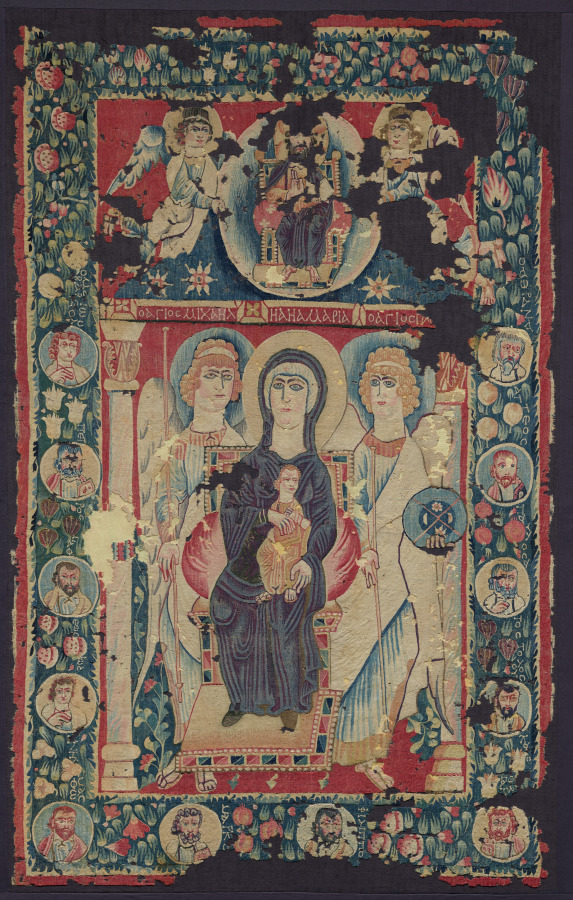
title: Icon of the Virgin and Child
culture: Egypt, Byzantine period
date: 500s CE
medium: wool and dye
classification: Textile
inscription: on the lintel of the architectural setting, the Greek inscription translates as: The Holy Michael, The Holy Mary, The Holy Gabriel. The wide foliate border is decorated with fruits and flowers and, in the lower part, with medallions containing the busts of apostles whose names are inscribed nearby in Greek and are translated as: Andrew, Matthew, Paul the Apostle, Luke, James, Phillip, Mark, Thomas, John, Matthias, Peter, and Bartholomew.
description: Woven from more than 20 colors of woolen thread, this rare tapestry was more expensive than a painting when it was made. The historical price reflected contemporary viewers’ appreciation for the skilled color blending by the weavers. Hung on a wall, this tapestry allowed viewers to venerate (honor) the Virgin Mary and the Christ Child in the Christian Orthodox church. Angels and apostles surround them, their names written in Greek. To be spiritually effective, an icon (devotional image) should follow its subject’s established visual tradition as closely as possible.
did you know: Created in Egypt's hot and dry desert climate, this tapestry features a border of lush greenery and fruits, while flowers peek out from around the throne of the Virgin. Imagine encountering this artistic oasis in a Coptic church during the dry heat of the day.